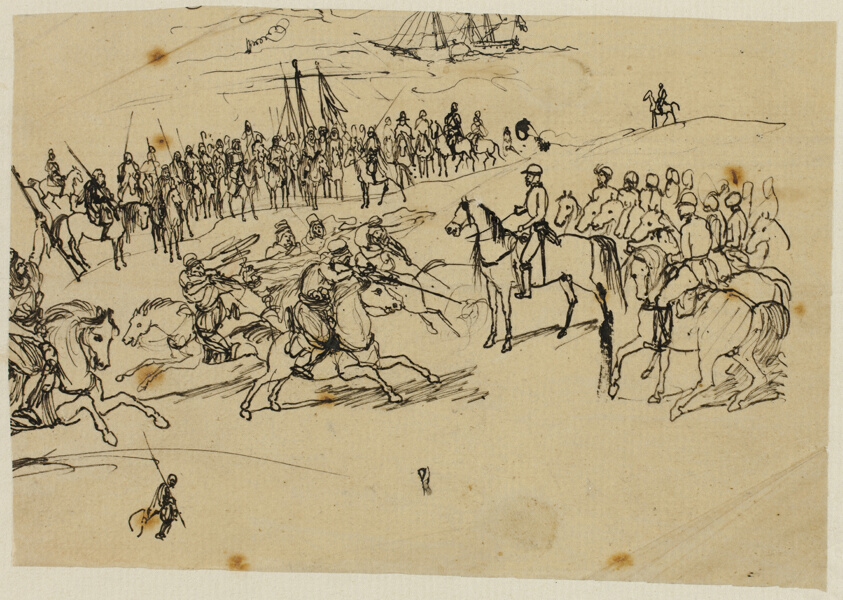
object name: Drawing and Watercolor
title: Arabian Fantasy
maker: Rodolphe Bresdin (French, 1825-1885)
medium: Pen and black ink, on tan tracing paper, laid down on ivory laid paper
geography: France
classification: pen and ink drawings; drawings (visual works); prints and drawing